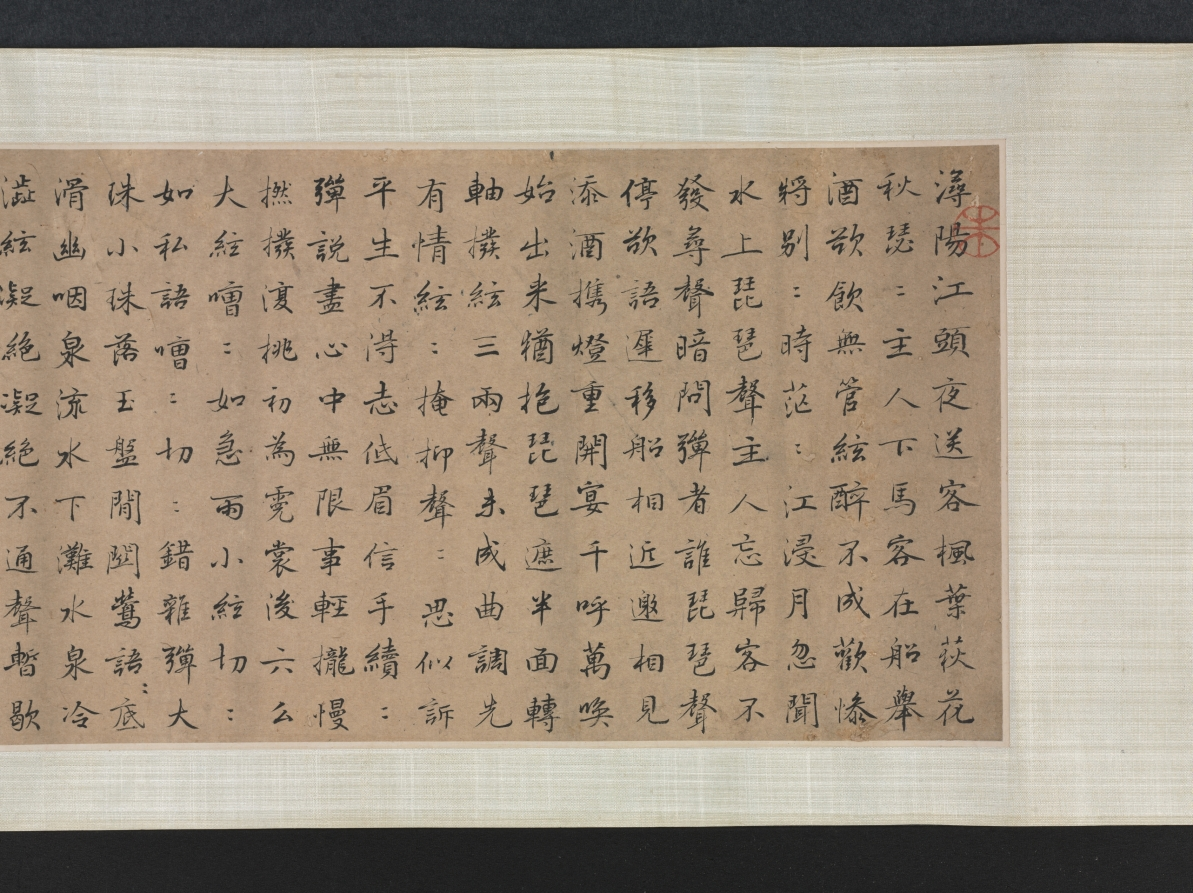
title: Saying Farewell at Xunyang (Song of the Pipa)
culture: China, Ming dynasty (1368–1644)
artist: Wen Boren (Chinese, 1502–1575)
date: 1500s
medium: handscroll, ink and color on paper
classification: Painting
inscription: "潯陽送客圖" 五峰山人文伯仁寫于停雲館中 [印] 文伯仁; 五峰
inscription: 2 colophons and 9 additional seals: 1 transcription of "Pipa xing 琵琶行” (Song of Pipa) and 3 seals of Zhu Yizun 朱彜尊 (1629-1709); 2 seals of Wu Rongguang 吳榮光 (1773-1843); 1 colophon, dated 1826, and 3 seals of Wu Xijia 吳錫嘉 (mid-1700s)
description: This handscroll depicts The Song of the Pipa, a poem by Bai Juyi 白居易 (772–846) written after the poet’s encounter with a pipa player on the Yangzi River. Expelled from her home city when her beauty and fame had faded, she played for the poet at night. Her musical performance and tragic life story resonated with Bai Juyi, who had just been demoted and exiled from life at court himself. The hazy, vast view and pale color tonalities of this painting illustrate these feelings of endless sadness, having lost one’s sense of purpose in life.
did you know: Wen Boren depicted the chilly autumn water with a fishnet pattern.